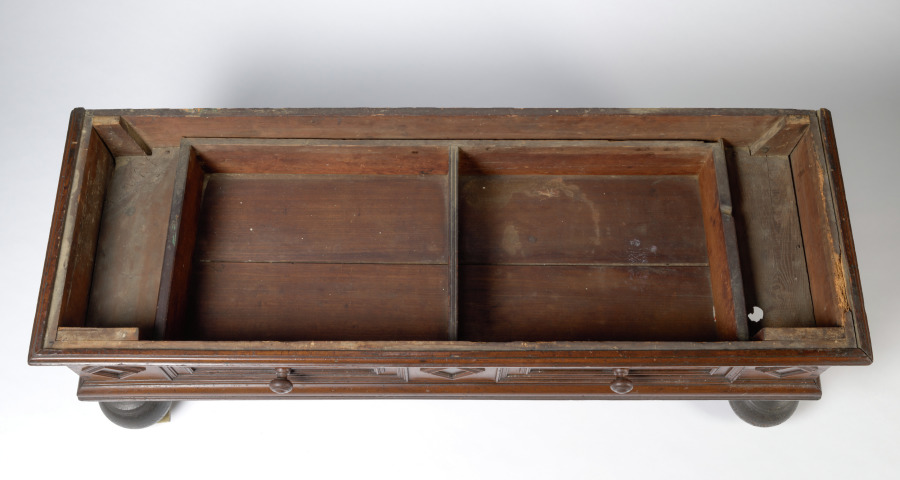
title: Kast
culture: American, King County, NY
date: c. 1710–1740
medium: Various woods, wrought iron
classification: Furniture and woodwork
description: The earliest furniture made in America often shared similarities with works made in the country from where the settlers originated. With its bun feet, paneled surface, and broad projecting cornice, this wardrobe (kast) resembles earlier Dutch examples that come from Amsterdam and its surrounding areas. Therefore, this wardrobe was likely made by the Dutch settlers who colonized New York and New Jersey.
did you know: This Dutch American wardrobe was likely made in a community along the Hudson River in New York by a cabinetmaker who had originally come from the region in or around Amsterdam in Holland.